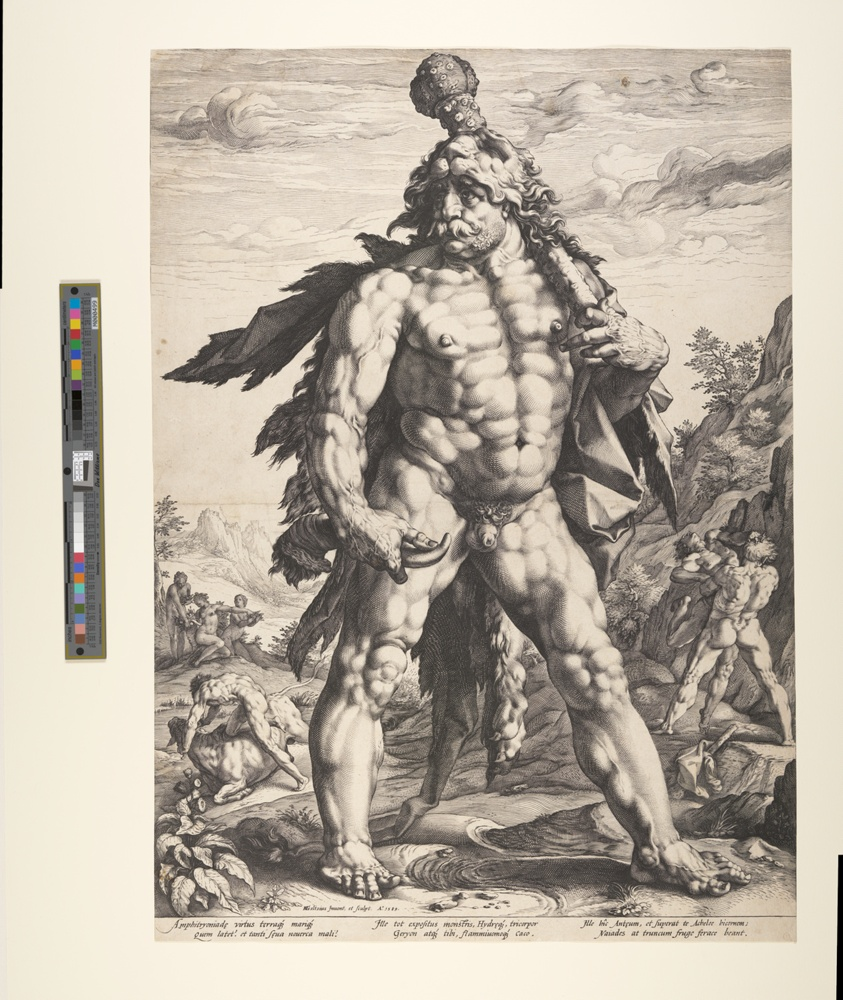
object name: Print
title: The Great Hercules (Knollenman)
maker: Hendrick Goltzius (Dutch, 1558–1617)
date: 1589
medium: Engraving on ivory laid paper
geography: Netherlands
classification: engraving; paper; print; prints and drawing